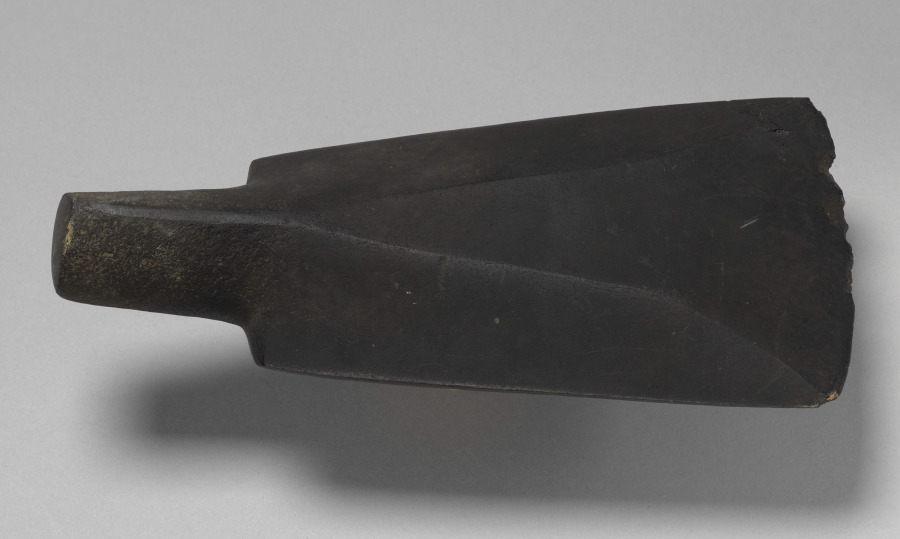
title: Blade from a Ceremonial Adze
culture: Polynesia, Mangaia, Cook Islands, 19th century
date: 1800s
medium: stone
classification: Sculpture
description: Before European contact, Polynesian carving tools were fashioned from bone, shell, stone, or teeth. The introduction of iron tools facilitated carving, while the demand of European sailors and missionaries for souvenirs provided a new market for craft products. Ceremonial adzes probably represented gods or spirits. The wooden handle of this example is carved with the characteristic K motif. The stone adze blade is lashed to the handle with finely plaited sennit fiber cord. According to legend, the distinctive pattern formed by the sennit lashing was taught to Mangaian craftsman by the gods.